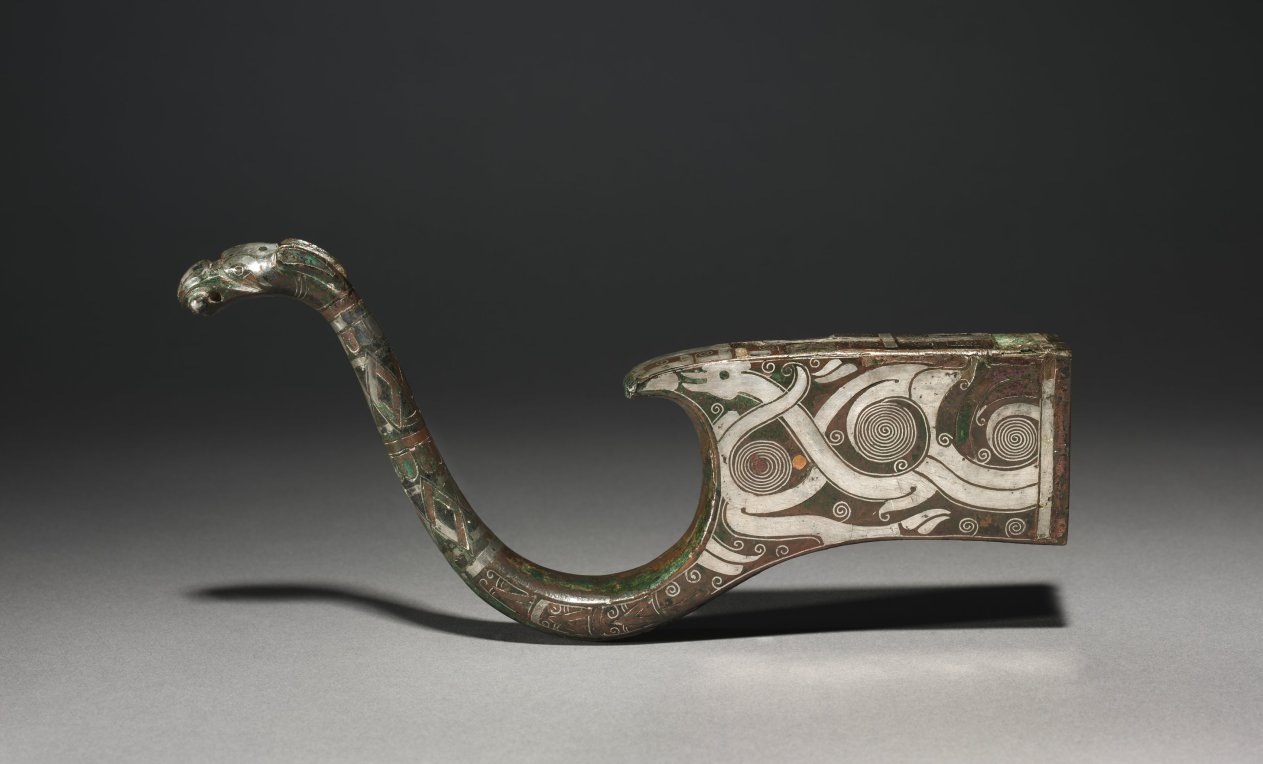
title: Crossbow Support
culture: China, Warring States period (475–221 BCE)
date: 300–200 BCE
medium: bronze inlaid with silver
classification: Metalwork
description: Here, the rectangular socket of the bow support tapers elegantly to form the slender neck of an animal head. Silver inlay of wires and ribbons form an extraordinarily beautiful abstract design consisting of sweeping lines, coils, spirals, and serpentine interlaces.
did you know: Both the support for the crossbow and the inlaid silver pattern on the square socket resemble a bird's long neck and head.